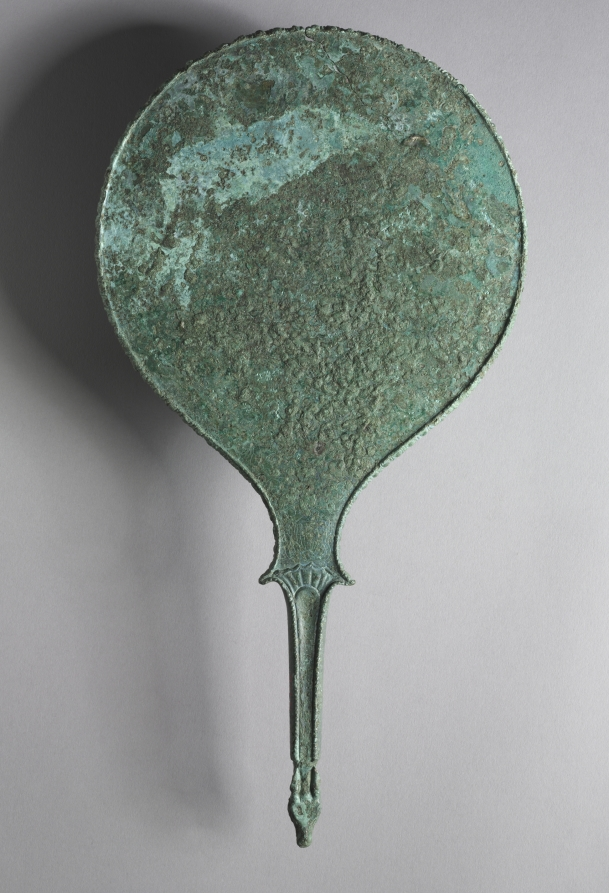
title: Mirror with Engraved Scene: Two Female Figures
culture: Etruscan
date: 330–300 BCE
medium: bronze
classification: Metalwork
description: Cast in one piece, this bronze mirror features a handle terminating in a stylized deer head. The front side of the disc, once highly polished and reflective, would have served as a mirror, while the reverse—now on display—features an engraved figural scene. Best observed with the aid of a line drawing, this shows two standing women, both draped and looking at one another. Without inscriptions, their identities remain uncertain, but the crescent overhead and the upright spear held by the righthand figure suggest that they may be the goddesses Artumes (Artemis) and Menerfa (Athena).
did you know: The piriform shape of this mirror suggests that it was produced in Praeneste (modern Palestrina).